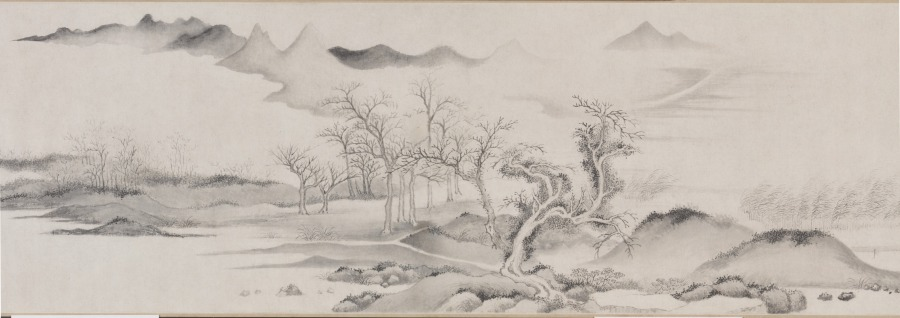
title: Water Village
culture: China, Ming dynasty (1368–1644)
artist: Wen Boren (Chinese, 1502–1575)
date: 1570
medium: handscroll; ink and light color on paper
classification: Painting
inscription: 隆慶庚午秋仿趙文敏筆. 五峰文伯仁 [印] 五峰山人; 文伯仁印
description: In the autumn of 1570, Wen Boren painted this seemingly unemotional scene of low-lying marshlands with a chain of rounded mountains in the background. A fishing boat is nestled on the shore near the village. Although paths and bridges traverse the landscape, only two people are visible in the stillness. From the restrained atmosphere of this landscape, one would never guess that Wen Boren was known as the “bad boy” of the Wu School for his explosive temper. As a younger man, he was even embroiled in a contentious lawsuit with his own uncle, Wen Zhengming (1470–1559), a master of Ming dynasty painting with whom he had trained. The ideal of the scholar-painter, or literati, was that an artist’s moral character is reflected in his paintings, so there was great incongruity between Wen Boren’s difficult personality and his restrained landscapes. A contemporary, Wang Shizhen, wrote this about him: "This gentleman is prone to behave odiously and screamed accusations at people. How is it possible for him to carry in his bosom such a wealth of scenic wonders?" Who knows what effort it took to subdue his fractious spirit to project an image of coolness and refined taste in his paintings?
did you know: A foreground tree has an eccentric twisting silhouette and pepper-dot "halo" of leaves.